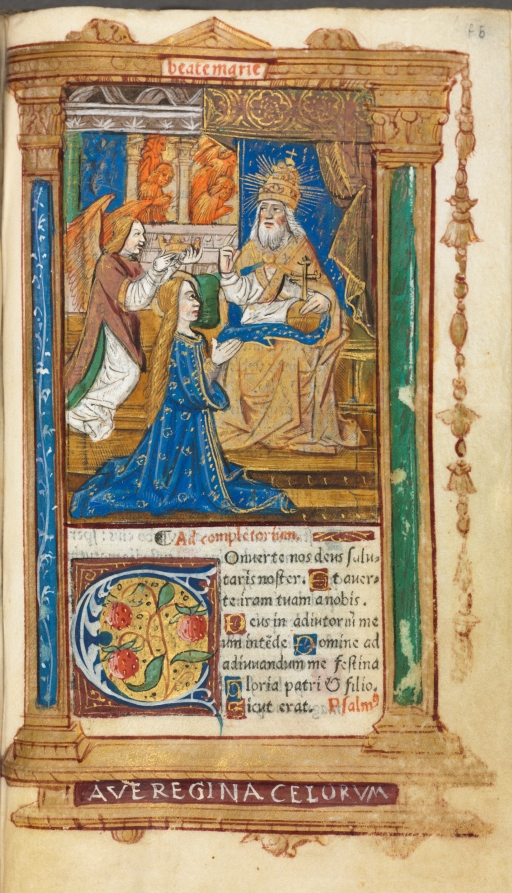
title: Printed Book of Hours (Use of Rome): fol. 45r, Coronation of the Virgin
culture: France, Paris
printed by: Guillaume Le Rouge (French, Paris, active 1493–1517)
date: 1510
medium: 112 Printed folios on parchment, bound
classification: Bound Volume